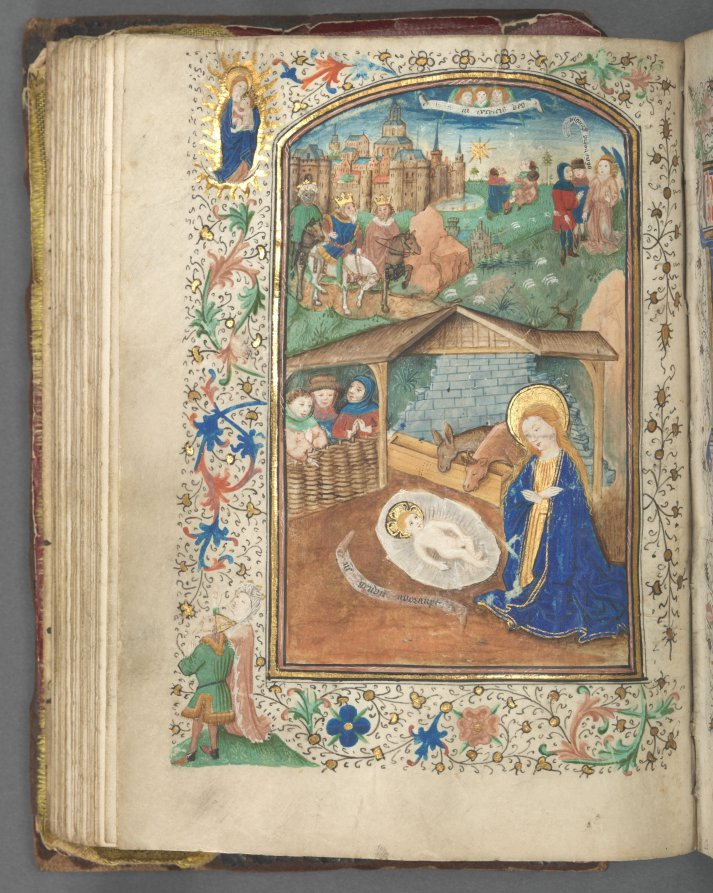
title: Book of Hours (Use of Utrecht): fol. 62v, The Nativity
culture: Netherlands, Utrecht, 15th century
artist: Master of Gijsbrecht van Brederode (Netherlandish)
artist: Master of the Boston City of God (Netherlandish)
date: c. 1460–1465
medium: ink, tempera, and gold on vellum; binding: brown Morocco over original wooden boards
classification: Bound Volume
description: This manuscript is a collaborative effort of two talented illuminators with distinctive styles. Ninety-seven historiated initials (letters containing scenes), including the one on recto (right side) shown here, are by the Master of the Boston City of God, a painter who worked in Utrecht. Four full-page miniatures (small paintings), including the Nativity on the verso (left side), have recently been attributed to the Master of Gijsbrecht van Brederode. The background of the Nativity depicts a distant cityscape (perhaps Utrecht), adjacent to which may be seen the Journey of the Magi and the Annunciation to the Shepherds. In the left margin, the Virgin Mary (above) appears to the Roman Emperor Augustus and the Tiburtine Sibyl, who, according to legend, foretold the coming of Christ. This volume is not written in Latin, but in a Dutch littera textualis, an elegant Gothic bookhand.